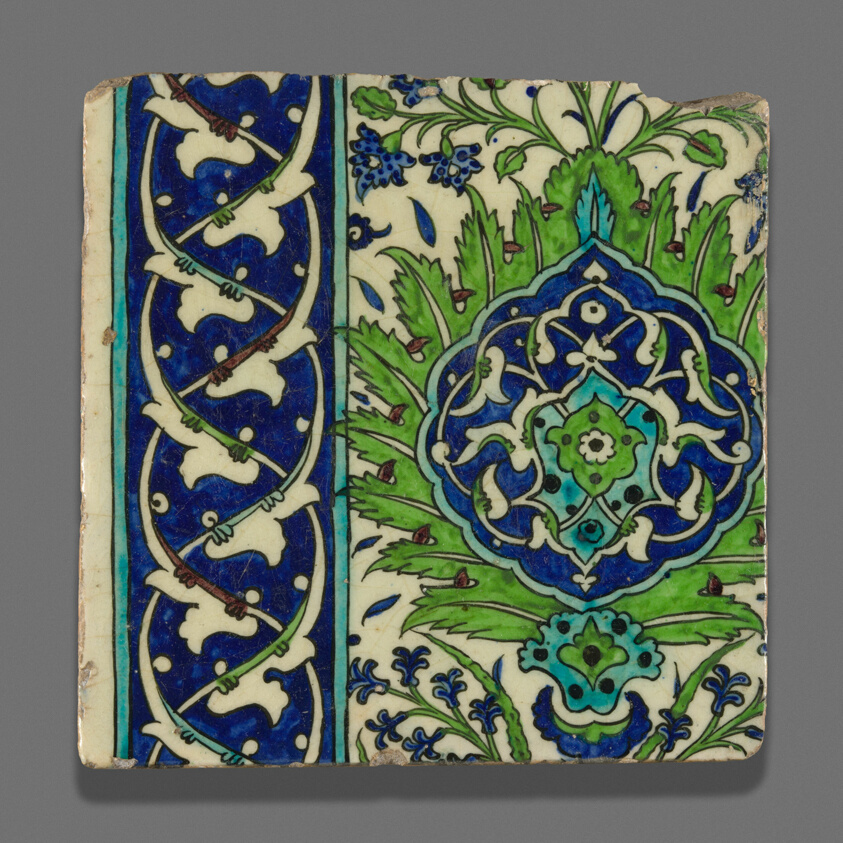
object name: Architectural fragment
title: Tile with Floral Design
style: Islamic (culture or style)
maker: Syria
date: Ottoman dynasty (1299–1923), 16th/17th century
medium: Fritware with polychrome painting under transparent glaze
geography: Damascus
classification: earthenware; asian art; ceramics; decorative arts